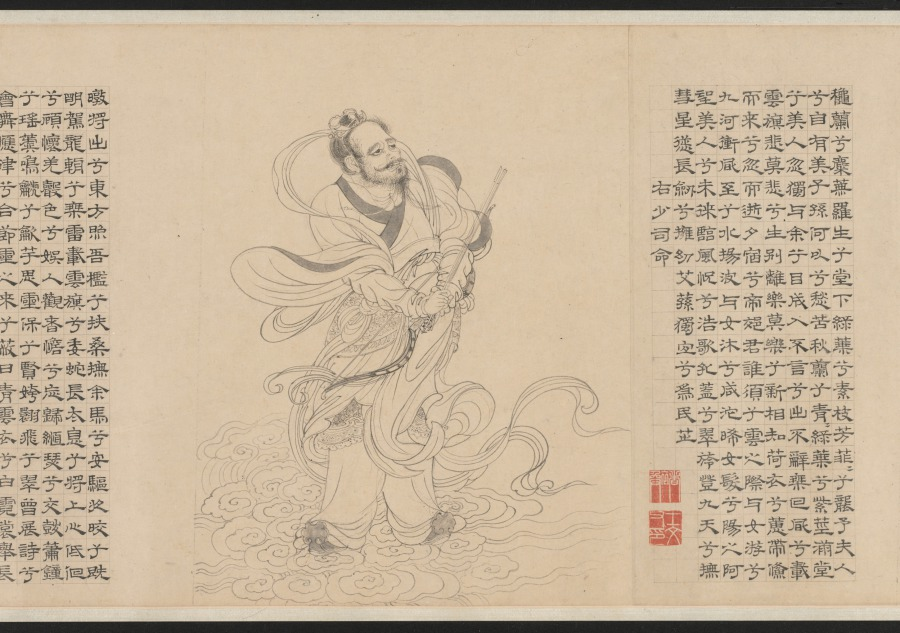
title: Nine Songs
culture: China, Yuan dynasty (1271-1368)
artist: Zhang Wo (Chinese, active c.1336–after 1364)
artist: Chu Huan (Chinese, active 1361)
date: 1361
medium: handscroll; ink on paper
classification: Painting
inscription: 7 colophons and 47 seals: 1 colophon, dated 1361, and 28 seals of Chu Huan 褚奐 (active c. 1361); 1 colophon, dated 1785, and 1 seal of Lu Shihua 陸時化 (1714-1779); 2 seals of Lu Yü-ch'ing (18th c.); 1 colophon, dated 1935, of Ye Gongchuo 葉恭綽 (1881-1968); 1 colophon, dated 1935, of Wu Hufan 吳湖帆(1894–1968); 1 colophon, dated 1938, and 1 seal of Wang Tongyu 王同愈 (1856-1941); 1 colophon, dated 1941, of Wu Huayuan 吳華源 (1893-1972); 1 colophon, dated 1942, and 9 seals of Xu Bangda 徐邦達 (1911–2012); 1 colophon, dated 1942, of Lang Jingshan 郎靜山 (1892-1995); 1 colophon, dated 1944, of Tang Yun 唐雲 (1910-1993); 6 seals of Wang Jiqian [C.C. Wang] 王季遷 (1907–2003).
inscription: Text of The Nine Songs written by Chu Huan at the end of each section.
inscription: 右離騷九歌圖，宋龍溟居士李公本，淮南張渥叔厚所畫妙絕當世。家藏請予書其辭目識于左。至正二十一年辛醜三月旦河南褚奐記。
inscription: Colophon by Lu Shihua 陸時化 (1714–1789): This scroll is fortunate to have been handed down from collections of the right people. Now, after 500 years, its condition is as good as when it was painted. I acquired this from Mr. Shen Guiyu [1673-1769], the President of the Board of Rites. The label is in his handwriting when he was 95 years old. I submit that Chu Huan (t. Shiwen) of the Yuan Dynasty was a native of Qiantang. His "seal" and li writings are in the style of Wu Rui. For example, in [Chu Kuei's] Ming ji lu [A list of masterpieces] is recorded the stele commemorating the restoration of the prefectural school of Kun-shan, the text of which was composed by Yang Weizhen in the twenty-first year of Zhizheng [1361]; and the calligraphy as well as the title in li style was by Chu Huan, who was at that time an assistant judge of the prefecture of Haining in the circuit of Hangzhou. Zhang Wo's zi is Shuhou (叔厚). His literary name is Zhen Qisheng (贞期生). According to [Gu Ying's] Yu shan cao tang ya jii, he liked to paint in the bai-miao or the "pure delineation" style after the method of Li Longmian [Li Gonglin 李公麟], which finds no peer among the ancient masters. This is agreed upon [by Pei Ch'iung] in his Qing jiang zhi who praised [Zhang Wo] as being quite learned and well-versed in many branches of the arts, especially figure painting. Recorded by Lu Shihua [The mountain dweller], listening to the pine, in the twelfth month of the yisi year [1785].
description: Painted in the baimiao, or fine-line drawing style, this ancient work demonstrates the literati’s use of abstract calligraphic brushwork for self-expression. The subject of the “Nine Songs”—songs associated with shamanistic rituals in the ancient Chu kingdom—had traditionally provided artists with myths and legends that they could explore and reinterpret in their own works.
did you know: Divided into eleven sections, the scroll contains illustrations by painter Zhang Wu followed by a transcription of the relevant verse by calligrapher Chu Huan.